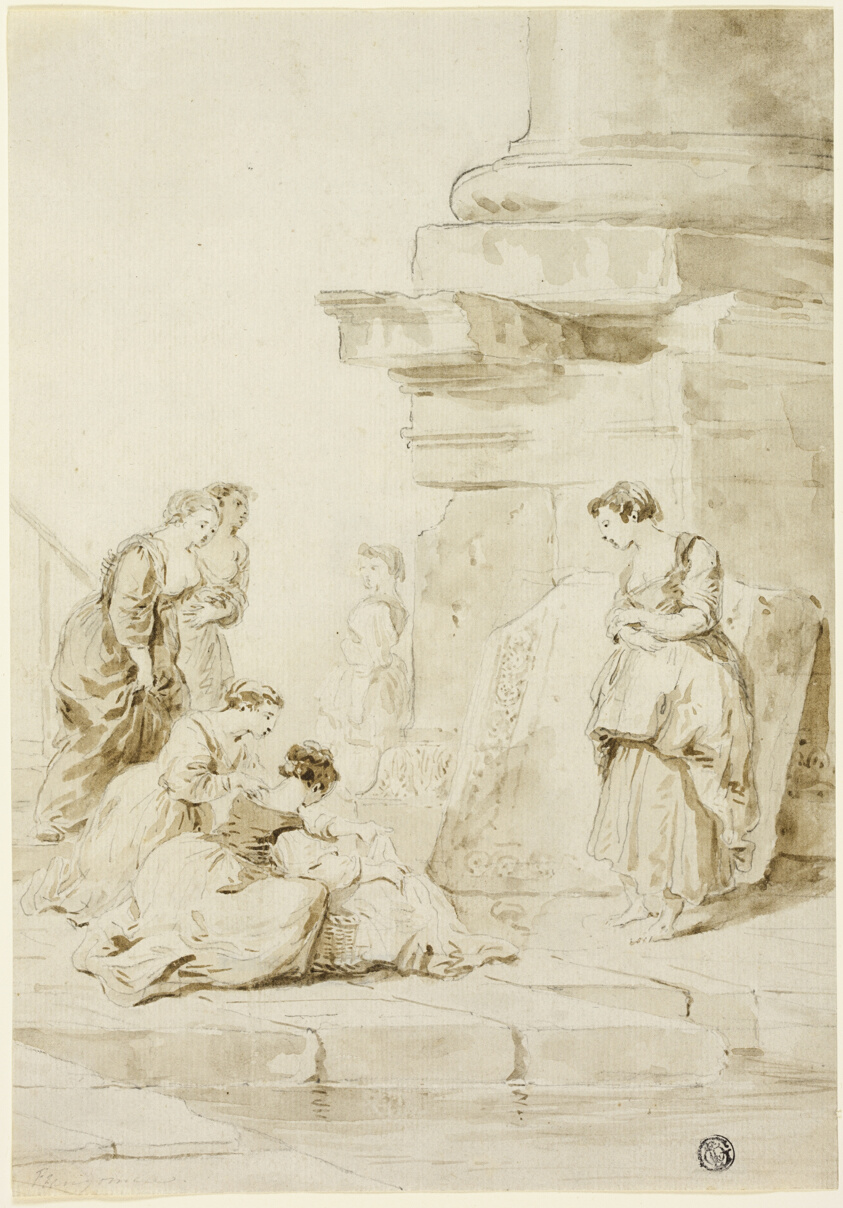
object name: Drawing and Watercolor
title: Moses Saved from the Waters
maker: Hubert Robert (French, 1733-1808)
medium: Black chalk, with brush and brown wash, on ivory laid paper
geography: France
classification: ink or chalk wash; drawings (visual works); prints and drawing